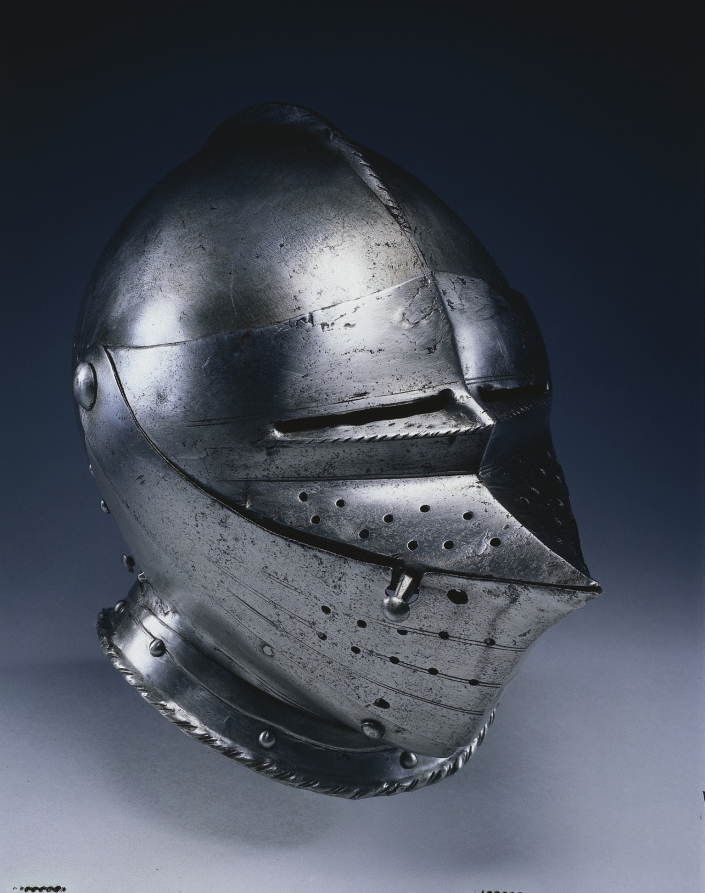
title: Close Helmet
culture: Germany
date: c. 1510–30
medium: steel with black paint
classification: Arms and Armor